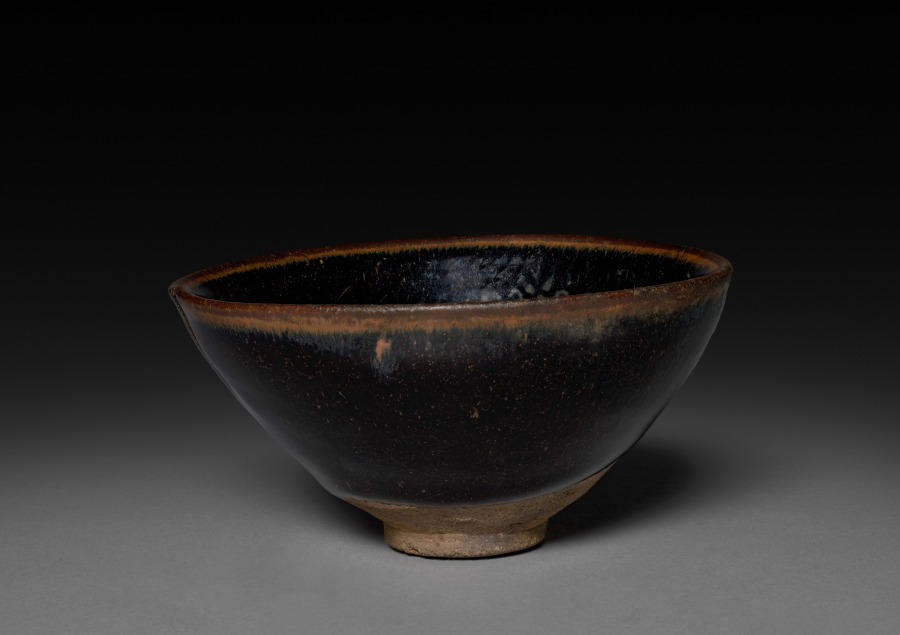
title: Tea Bowl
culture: China, near Shui ch'i, Song dynasty (960-1279)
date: 960–1279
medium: Stoneware, Jian ware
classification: Ceramic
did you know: Jian ware was very popular with the tea cultures in China and Japan.